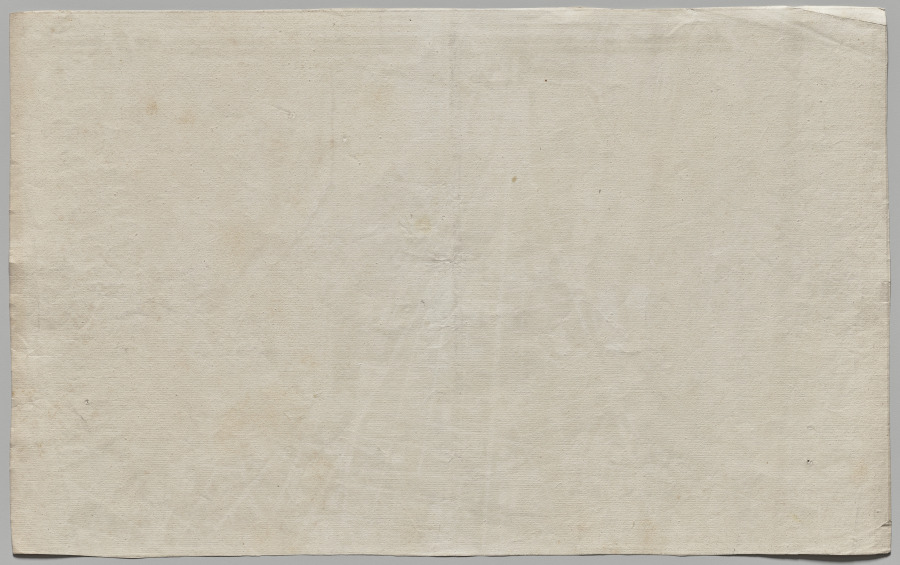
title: Nuova pianta di Roma data in luce da Giambattista Nolli l’anno MDCCXLVII, known as La Pianta Grande di Roma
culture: Italy, 18th century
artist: Giovanni Battista Nolli (Italian, 1701–1756)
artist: Carlo Nolli (Italian, 1690–1790)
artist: Rocco Pozzi (Italian, 1701–1774)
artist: Pietro Campana de Soriano (Italian, 1725–c. 1779)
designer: Stefano Pozzi (Italian, 1699–1768)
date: 1748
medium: etching and engraving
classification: Print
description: The monumental Pianta Grande di Roma, or Large Plan of Rome, which measures about 5 x 7 feet when its twelve plates are assembled, is a landmark in both cartography and printmaking. The map is considered the first scientific rendering of Rome, establishing new standards of accuracy and thoroughness when it was published in 1748. Devised by the Lombard architect and surveyor Giovanni Battista Nolli (Italian, 1701-56), the creation of the map required over ten years of surveying the city carried out by Nolli and a team of assistants with the help of new measuring devices. In Nolli’s “ichnographic” (also called “ground”) plan, architectural features and the urban infrastructure are reduced to a single horizontal slice, a minutely detailed footprint that conveys dimensions, proportions, and orientations to scale with the utmost clarity.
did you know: To make this map, Pope Clement XII granted the mapmaker permission to measure courtyards and other interior, inaccessible spaces in monastic communities, even those in nuns’ convents, which was controversial at the time.